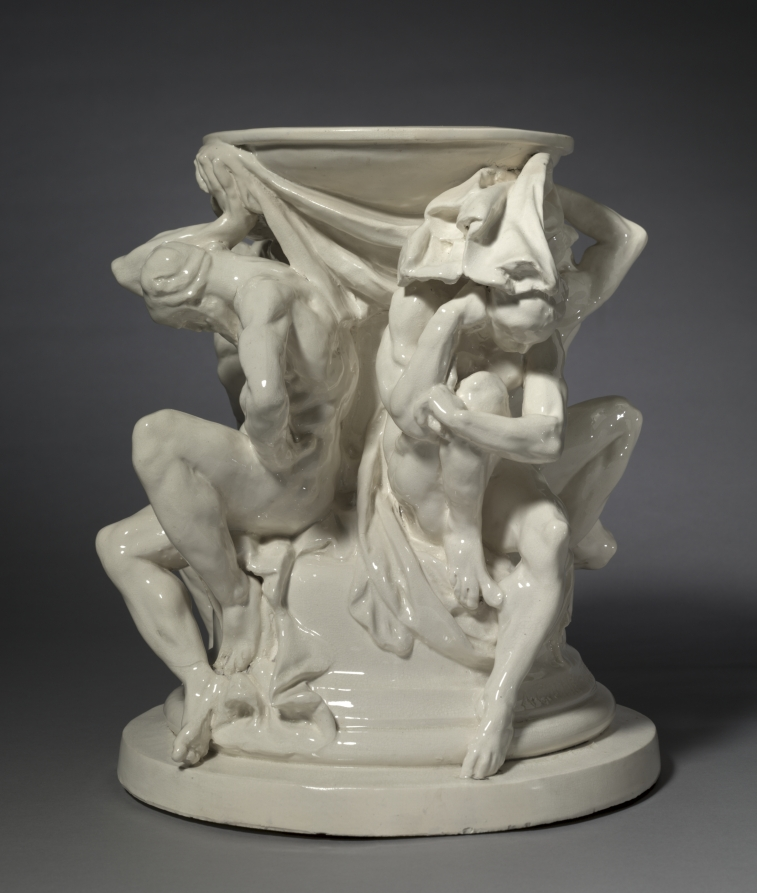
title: Titans, Support for a Vase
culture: France, made at Choisy le Roi, 19th century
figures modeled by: Auguste Rodin (French, 1840–1917)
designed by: probably by Albert-Ernest Carrier-Belleuse (French, 1824–1887)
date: c. 1877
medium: glazed earthenware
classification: Ceramic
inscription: incised near bottom of plinth: "A. CARRIERE-BELLEUSE."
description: During his lifetime and afterward, Auguste Rodin was viewed as the modern equivalent to Michelangelo. Rodin worked against the prevailing styles of his time and may have seen parallels between his own struggles and Michelangelo’s reputation in the 1800s as a suffering genius. In 1875 Rodin went to Italy to study Renaissance art, specifically works by Michelangelo. The twisting titans (giants) on this pedestal base are directly inspired by Michelangelo’s ignudi (male nudes) on the Sistine Chapel ceiling. Rodin did not directly copy the poses but translated the energy and movement of the nudes into new, three-dimensional forms.